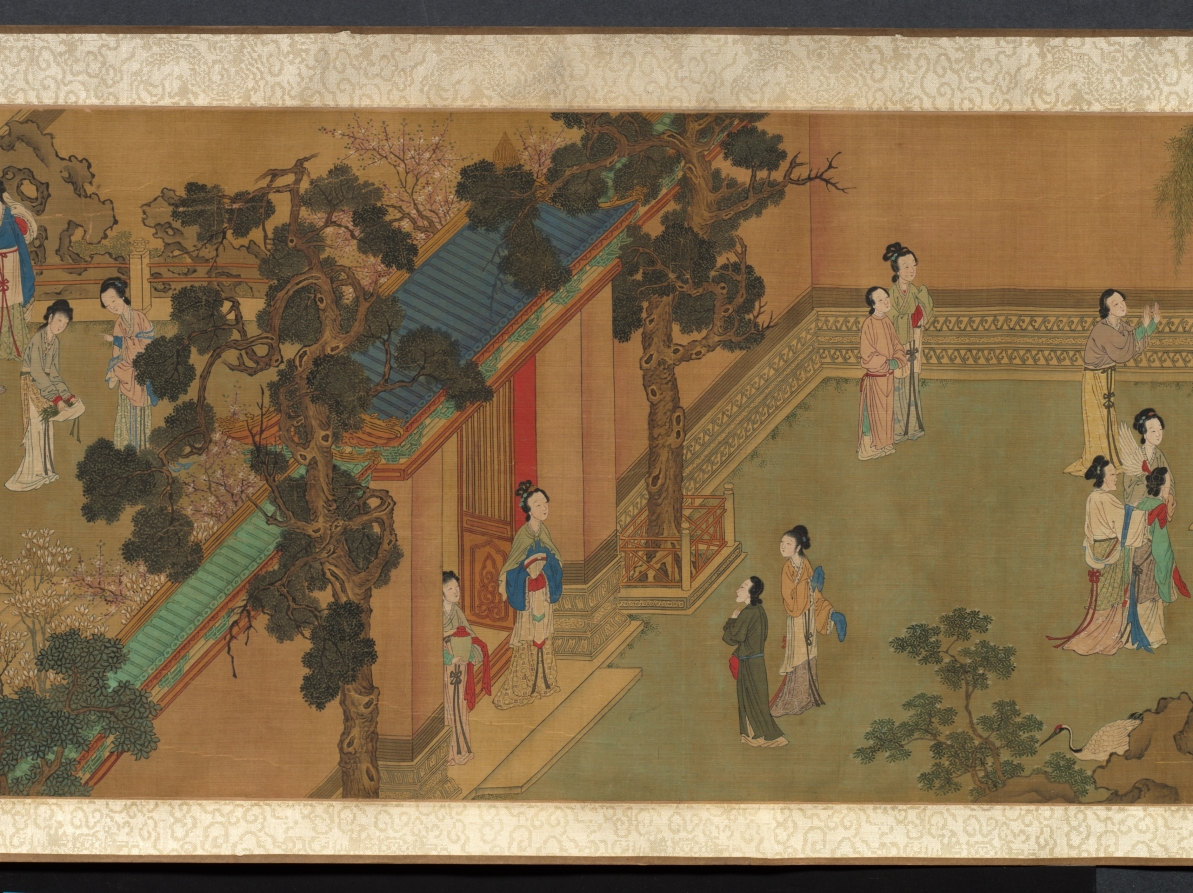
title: Palace Ladies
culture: China, Qing dynasty (1644-1911)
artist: copy after Qiu Ying (Chinese, 1494–1552)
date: 1644–1911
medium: handscroll, ink and color on silk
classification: Painting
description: This handscroll illustrates the pursuits of court ladies in a palace precinct on a spring day. Women, young girls, and their maids amuse themselves by sitting on a swing, playing games, watering and admiring peonies, performing music together, playing the qin (zither), feeding a parrot on the balustrade and fish in the water, or catching butterflies. The life of elite women was mostly restricted to the so-called inner quarters, meaning the garden and inner courts of the house. This painting idealizes the world of young palace girls that in fact was often filled with boredom and waiting for a lover.